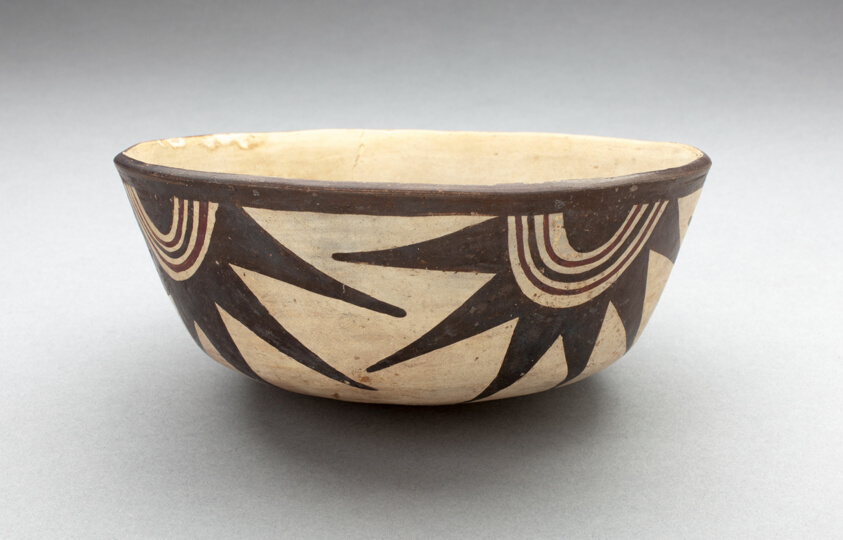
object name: Vessel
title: Bowl with Half-Circle with Projections Motifs Descending from Rim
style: nazca, early intermediate period, Pre-Columbian, americas, Arts of the Americas, andean, andes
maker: Nazca; South coast, Peru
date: 180 BCE–500 CE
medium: Ceramic and pigment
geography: Nazca Valley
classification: bowl; earthenware; art of the americas; ceramics; vessel